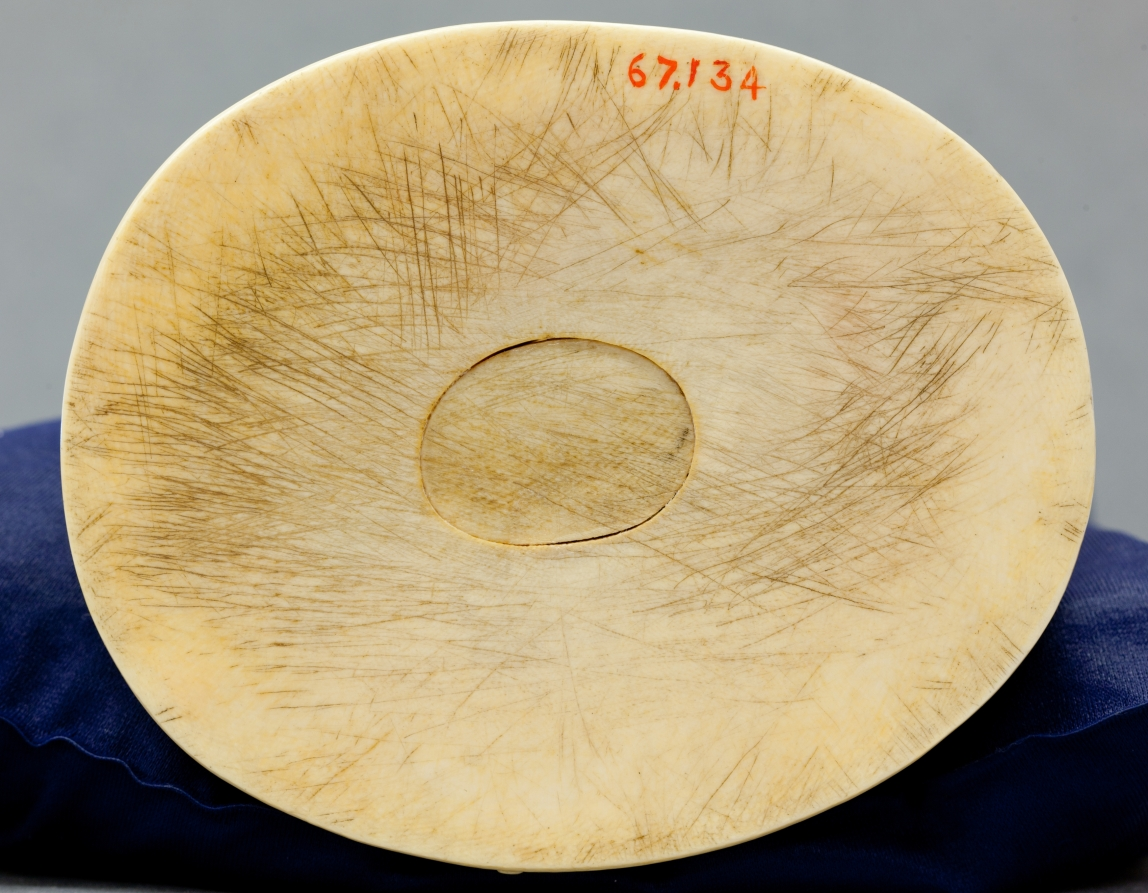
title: Descent from the Cross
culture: Austria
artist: Adam Lenckhardt (German, 1610–1661)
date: 1653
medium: ivory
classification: Sculpture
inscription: inscribed with monogram "AL" conjoined and dated 1653.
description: Carved from a single piece of ivory for Prince Karl Eusebius von Liechtenstein of Vienna, this work is a true tour-de-force. It took Lenckhardt seven years to complete; it is his last known sculpture and the pinnacle of his career. The biblical accounts of the descent from the cross found in the gospels are not consistent, which may contribute to the difficulty in precisely identifying the figures. The Virgin Mary, Saint John, Mary Magdalene, and others were said to be present, but undoubtedly there are other disciples here mourning Christ’s death. The intense emotion registers on the faces of the figures in the scrupulous and exquisitely detailed work.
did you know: Carved from a single elephant tusk, the artist took special care to ensure the ivory did not crack or break as he meticulously crafted each figure in this visually exciting sculpture. Look closely to find tools and small objects included near its base.